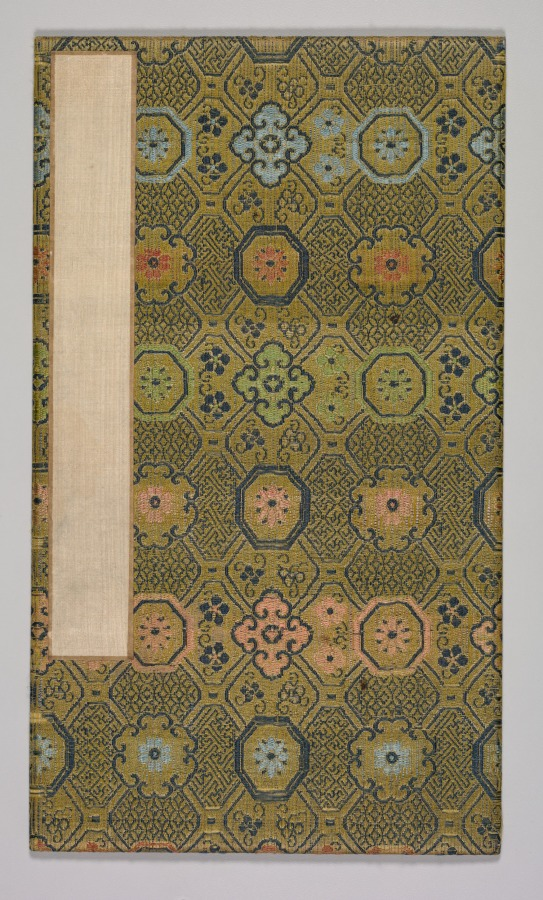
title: Reverberations of Taiga (Volume 2)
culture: Japan, Edo period (1615–1868)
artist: Aoki Shukuya (Japanese, d. 1802)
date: mid- to late 1700s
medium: one of a pair of albums; ink, or ink and light color on paper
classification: Portfolio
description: Traditionally, young painters in Japan began their studies with an established master-painter. The master's compositions invariably became models that the apprentice copied to learn various ink and brush techniques. Shukuya was a pupil of the famous Kyoto artist Ikeno Taiga, whose style is reflected in these sketches of rocks, trees, and mountains.